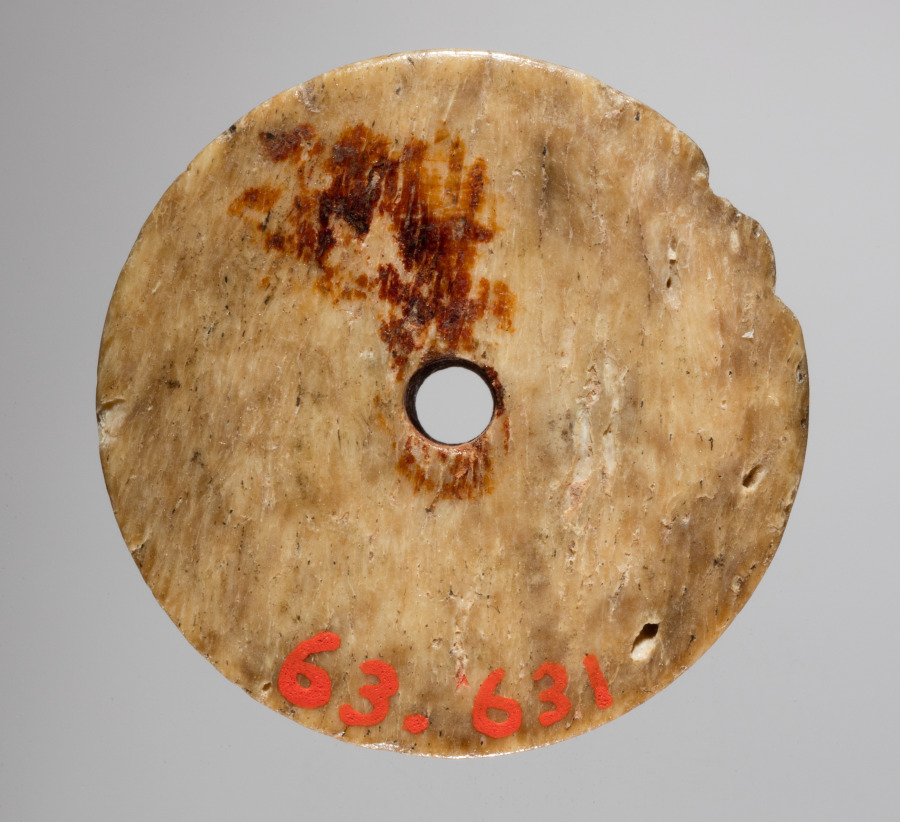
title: Spindle Whorl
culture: Iran, early Islamic period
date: 700s - 900s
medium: bone, incised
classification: Spindle Whorl